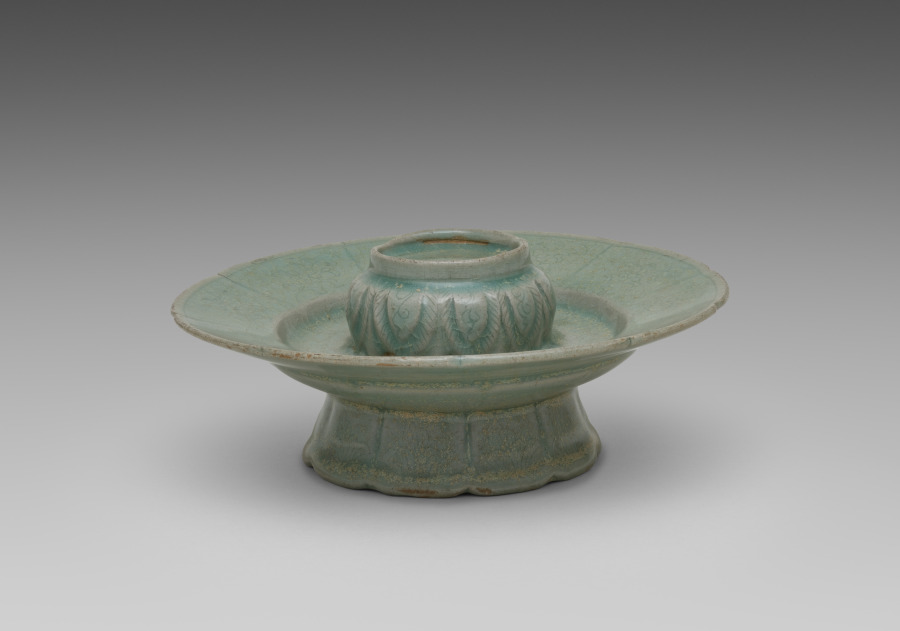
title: Floral-shaped Cup Stand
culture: Korea, Goryeo dynasty (918–1392)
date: 1200s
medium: pottery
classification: Ceramic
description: As early as the seventh century, the practice of drinking tea became an important part of elite culture in Korea. In enjoying teas, elites commissioned a variety of types of utensils and vessels including this delicate-looking cup stand, not only to make their tea-drinking experience more exciting, but also to show their refined taste.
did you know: Elites of the Goryeo period are known for their love of drinking tea and wine. This type of delicate-looking cup stands not only made their drinking experience more enjoyable, but also showed their refined taste.